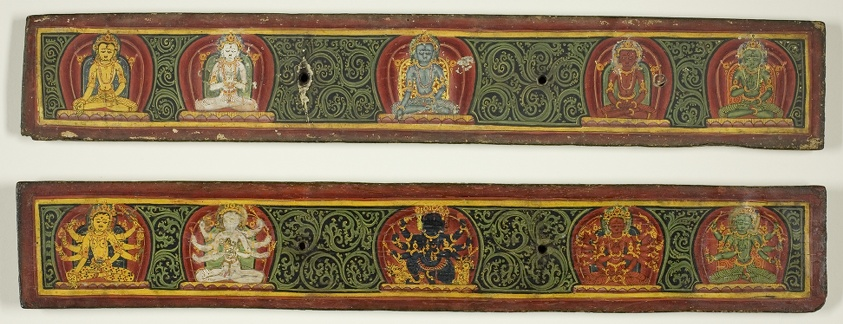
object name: Religious/Ritual Object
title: One of a Pair of Manuscript Covers from the Five Protectors (Pancharaksha)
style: Himalayan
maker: Nepal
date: 15th century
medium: Pigments and metallic paint on wood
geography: Nepal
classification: manuscript; ritual objects